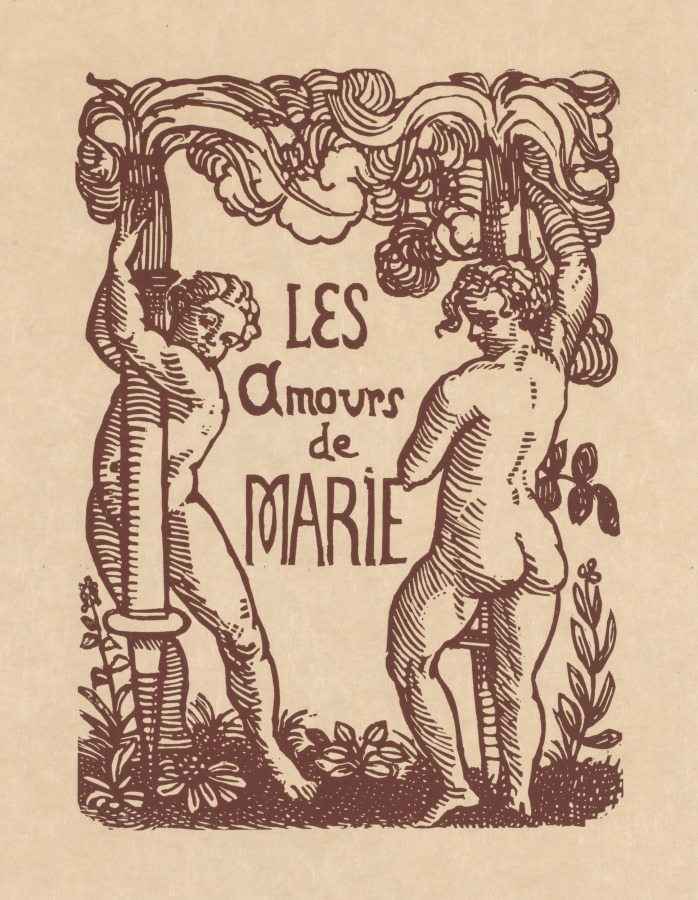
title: The Loves by Pierre Ronsard: The Loves of Marie (Les Amours de Pierre Ronsard: Les Amours De Marie)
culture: France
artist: Émile Bernard (French, 1868–1941)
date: 1915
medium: woodcut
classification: Print